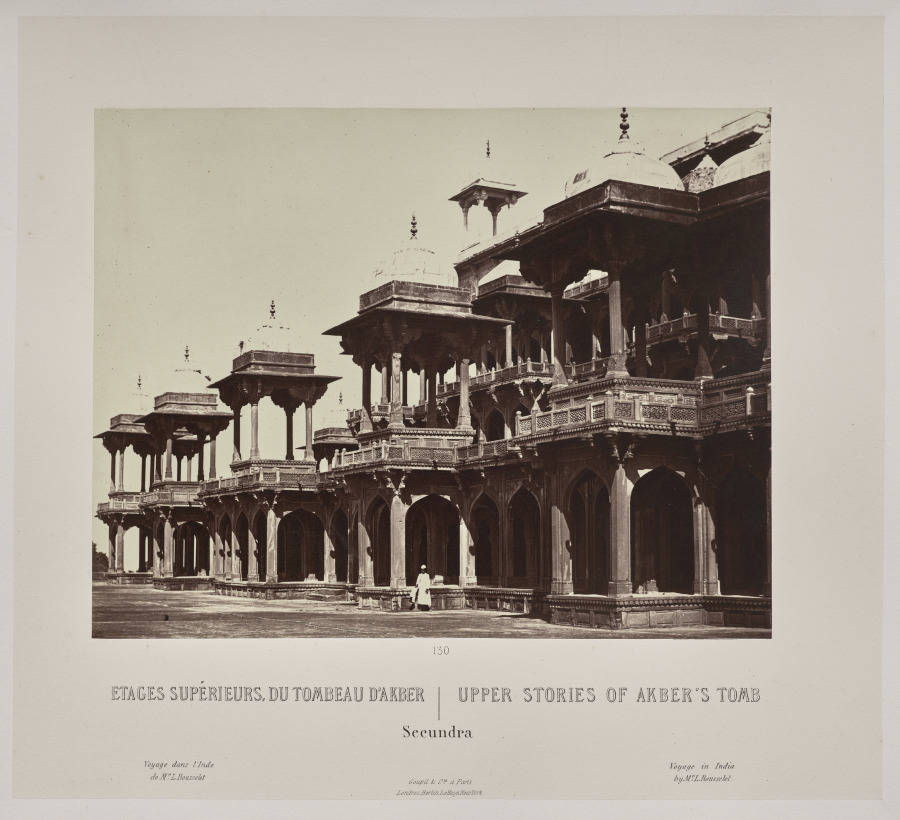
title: Upper Stories of Akber's Tomb, Secundra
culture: France, 19th century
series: India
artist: Louis-Théophile Marie Rousselet (French, 1845–1929)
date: 1865–68, published 1869–70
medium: Albumen print from glass plate negative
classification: Photograph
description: Concerned that his drawings did not do justice to the splendor of India’s monuments, Rousselet learned photography in India that year, a remarkable accomplishment. He proved to be a talented photographer with a sophisticated sense of composition. The scenes in this volume sweep across sites of Sultanate, Rajput, and Mughal power in northern India, from the sacred Hindu city of Varanasi on the Ganges River to Alwar in Rajasthan. Also included are several scenes of industry and portraits of Indian rulers.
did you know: Louis Rousselet described himself as a “scientific traveler” when he went to India alone at age 18 in 1863 and stayed into 1868.